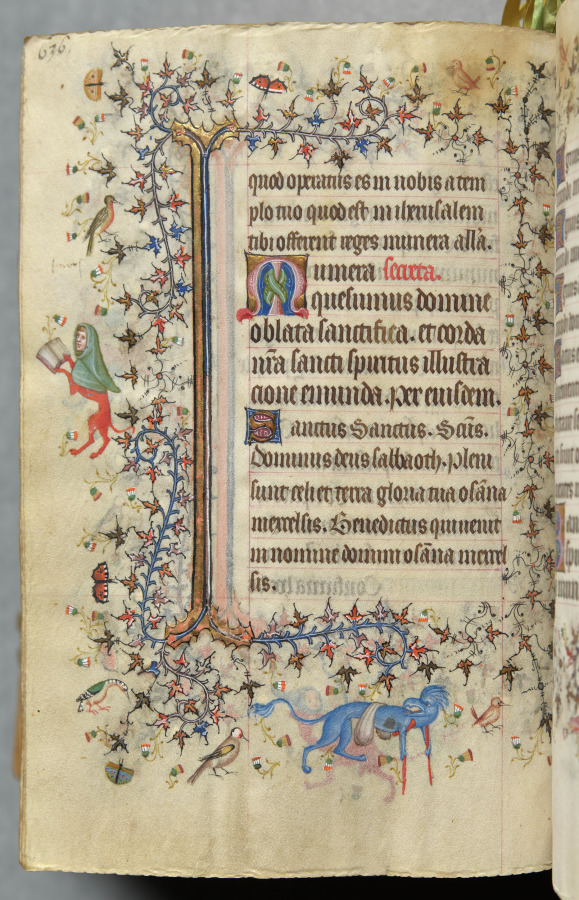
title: Hours of Charles the Noble, King of Navarre (1361-1425), fol. 312v, Text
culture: France, Paris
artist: Master of the Brussels Initials and Associates (French)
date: c. 1405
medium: ink, tempera, and gold on vellum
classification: Bound Volume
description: This precious volume was obviously highly prized by its owner, the French-born King of Navarre, who had his coat of arms painted on no less than twenty folios. Rather than directly commissioning this manuscript from a specific workshop, it seems that Charles the Noble acquired his book of hours -- perhaps ready-made for the luxury market -- while on a trip to Paris in 1404-05. A collaborative effort, six painting styles are evidenced within the pages of this codex, those of two Italians, two Frenchmen, and two Netherlanders. The painter who was responsible for the planning and decoration of the book, and who produced seventeen of the large miniatures, was a Bolognese artist known as the Master of the Brussels Initials. His principal assistant, responsible for most of the borders, was a Florentine who signed his name "Zecho" da Firenze on folio 208 verso.